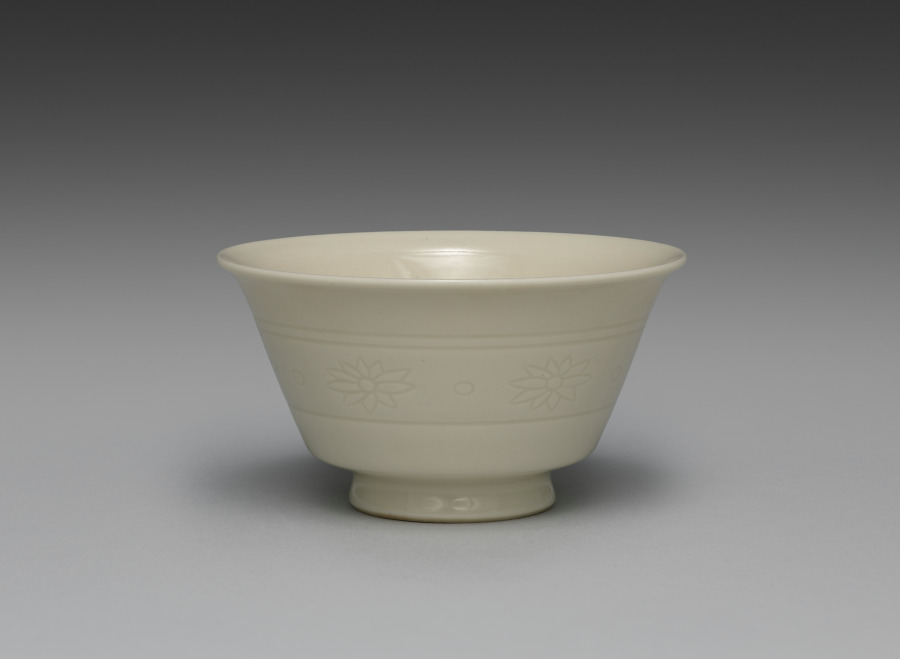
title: Teacup from Teacups with Floral Band Motif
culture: Japan, Meiji period (1868–1912)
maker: Seifū Yohei III (Japanese, 1851–1914)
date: 1893–1914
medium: One from a set of five cups; porcelain with incised decoration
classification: Ceramic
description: The five sencha teacups in this set are decorated with incised flowers and dots between a double band at the top and a single band at the bottom. They are in Yohei III’s creamy taihakuji body and glaze. In their motifs, they are quite similar to an incense burner by Yohei III (see CMA 2022.180), but the flowers are even more simple in design, with no open circle at the center. A label affixed to the side of the box refers to them as “sencha cups in emulation of Korean white [ware].” The reference to Korean ware indicates that even though Yohei was more directly inspired by Qing-dynasty wares from the Dehua kilns in Fujian Province in developing his porcelain clay and glaze for works such as these, the general understanding of the continental models still placed them, at least in terms of color, among pieces broadly associated in Japan with Korean white wares. The delicate cups are thinly potted, so they have a highly desirable translucency.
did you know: The delicate cups in this set are thinly potted, so they have a highly desirable translucency.